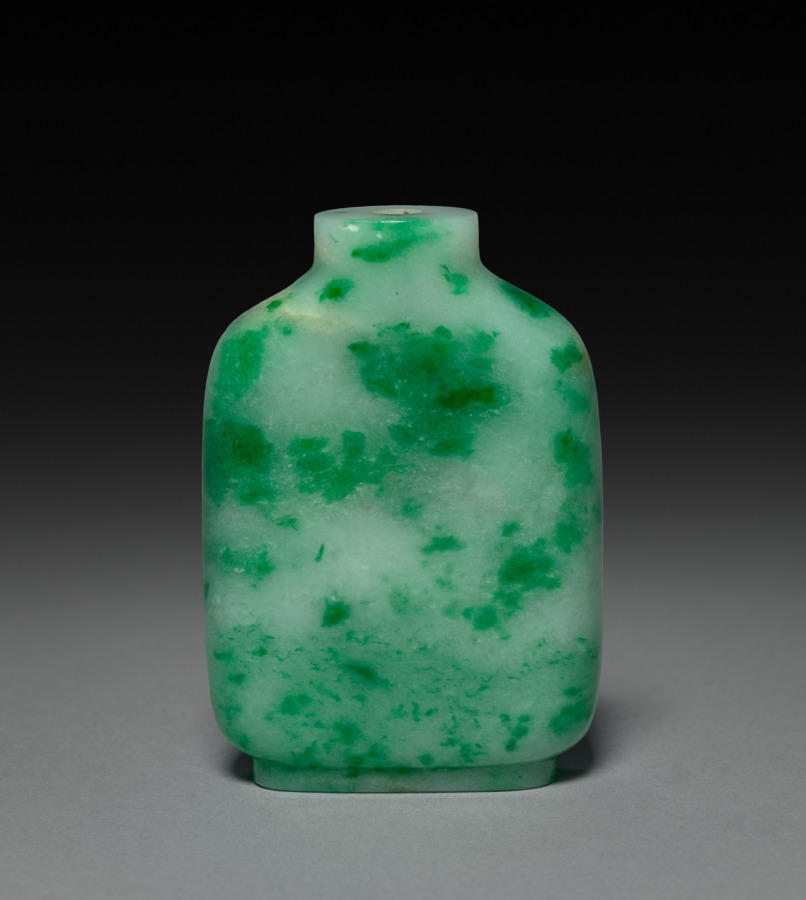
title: Snuff Bottle with Stopper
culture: China, Qing dynasty (1644-1911)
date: 1800s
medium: jade and rose quartz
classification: Jade